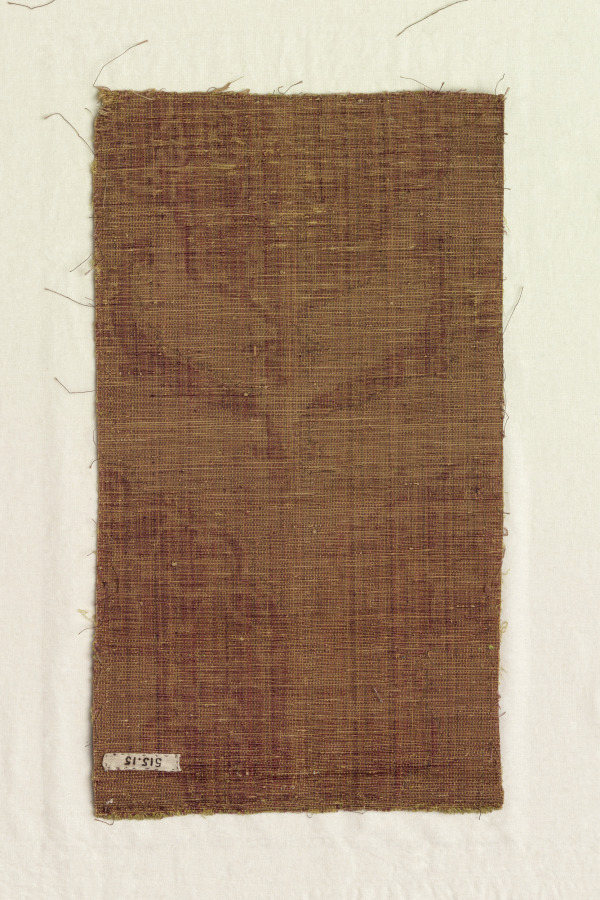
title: Fragments from Chasuble Front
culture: Italy, early 16th century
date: early 1500s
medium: velvet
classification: Velvet